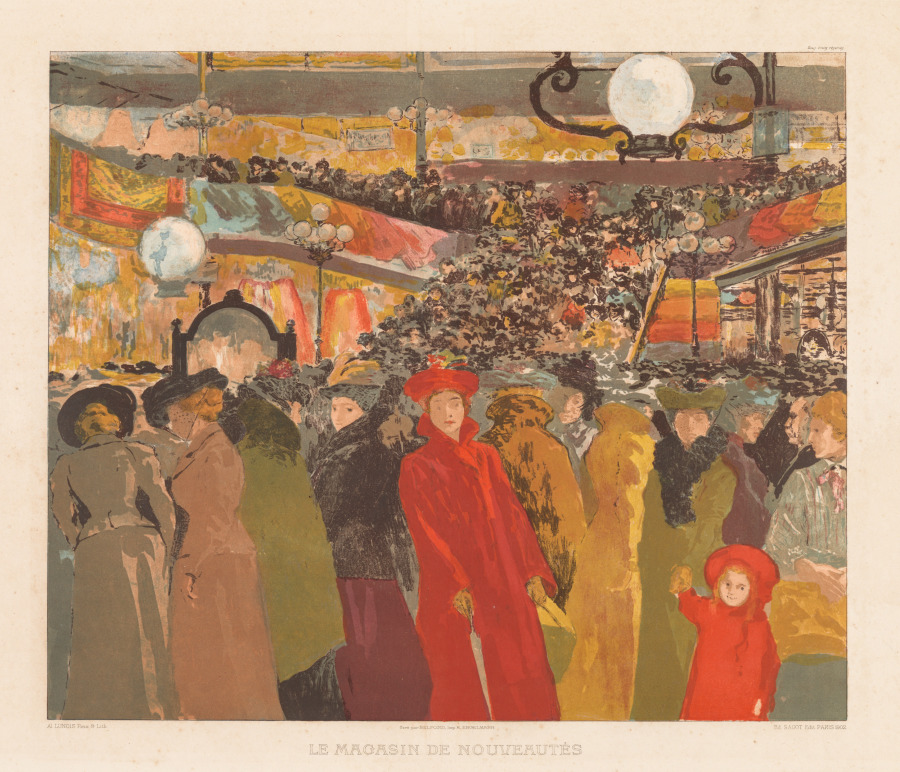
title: The Fancy Goods Store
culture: France, 20th century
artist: Alexandre Lunois (French, 1863–1916)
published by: Ed. Sagot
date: 1902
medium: color lithograph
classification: Print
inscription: Printed on plate: lower left, Al LUNOIS Pinx & Lith; lower center: Tire par BELFOND, Imp. R. ENGELMANN; lower right: Ed. SAGOT Edit. PARIS 1902; lower margin center: LE MAGASIN DE NOUVEAUTES; upper right: (printed upside down) Sno2 (printed right side up) droits reserves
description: Bonebrake was captivated by large vibrant works that exemplify expert color printing and attract attention when framed and displayed. The Fancy Goods Store, which depicts the Paris department store Le Bon Marché, is perhaps Lunois’s finest print.